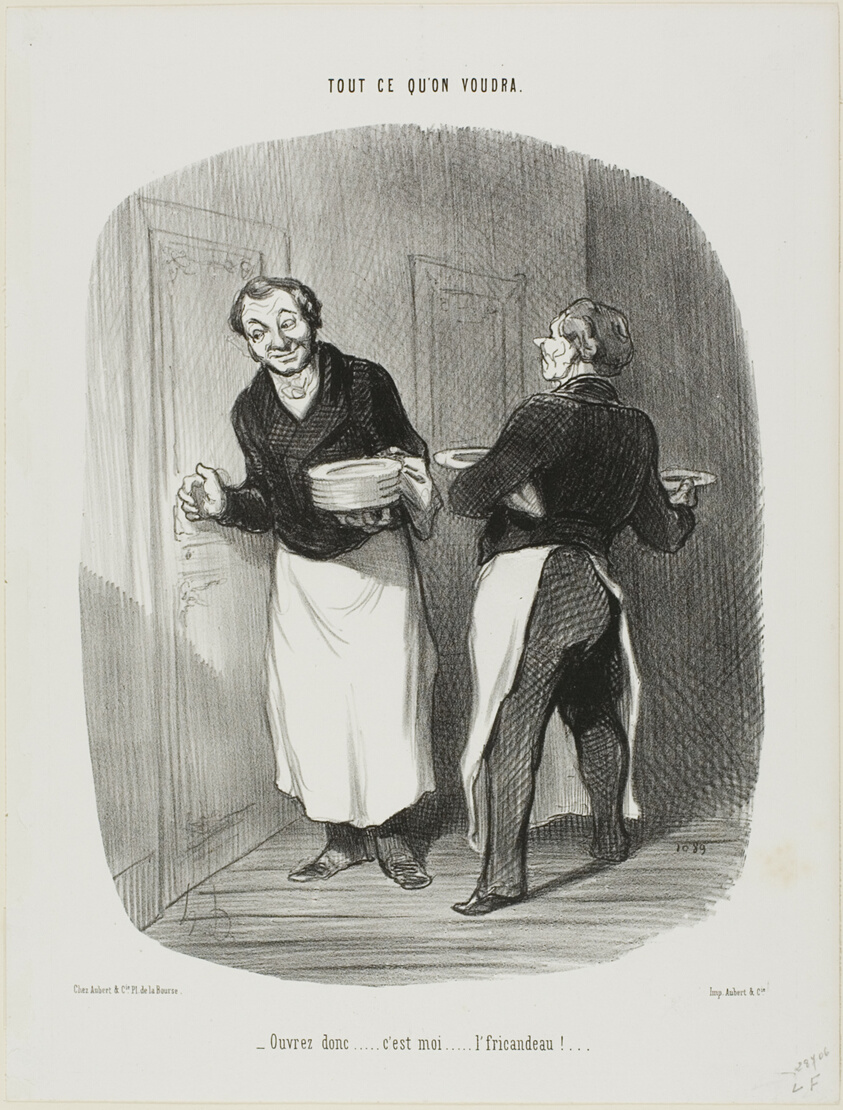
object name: Print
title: “- Open up..... it's me.... the veal-stew!,” plate 17 from Tout Ce Qu'on Voudra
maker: Honoré Victorin Daumier; French, 1808-1879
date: 1847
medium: Lithograph in black on white wove paper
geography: France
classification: lithograph; print; prints and drawing